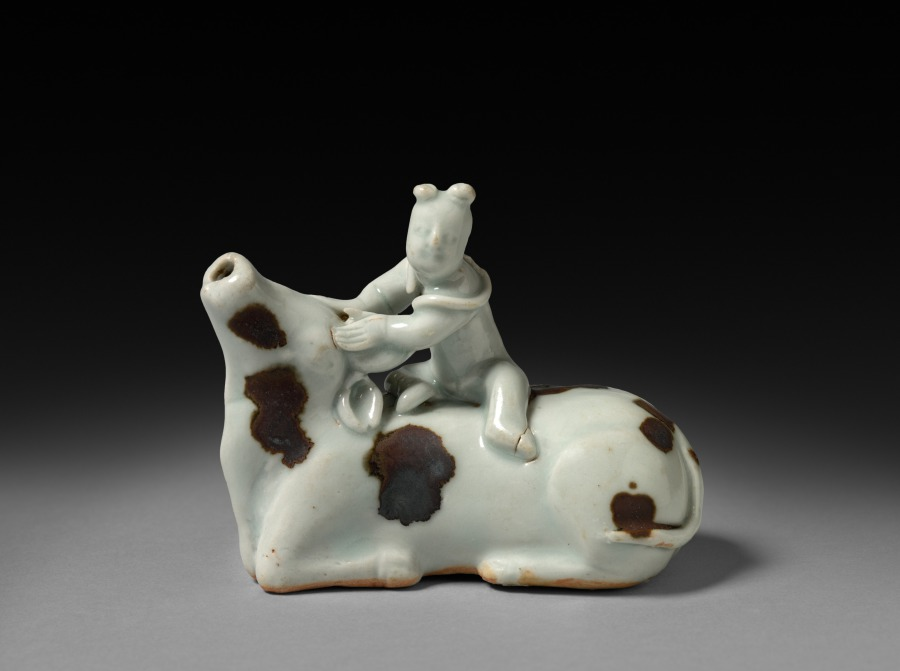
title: Buffalo with Rider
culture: China, Jiangxi Province, Jingdezhen kilns, Yuan dynasty (1271–1368)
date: early 1300s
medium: glazed porcelain with iron spots, qingbai ("blue-white") ware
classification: Ceramic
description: Boys tending buffalos were associated with a carefree life in the countryside free from the duties of officialdom. Water droppers contained water that was used to dissolve ink sticks into liquid ink for brush painting and writing.